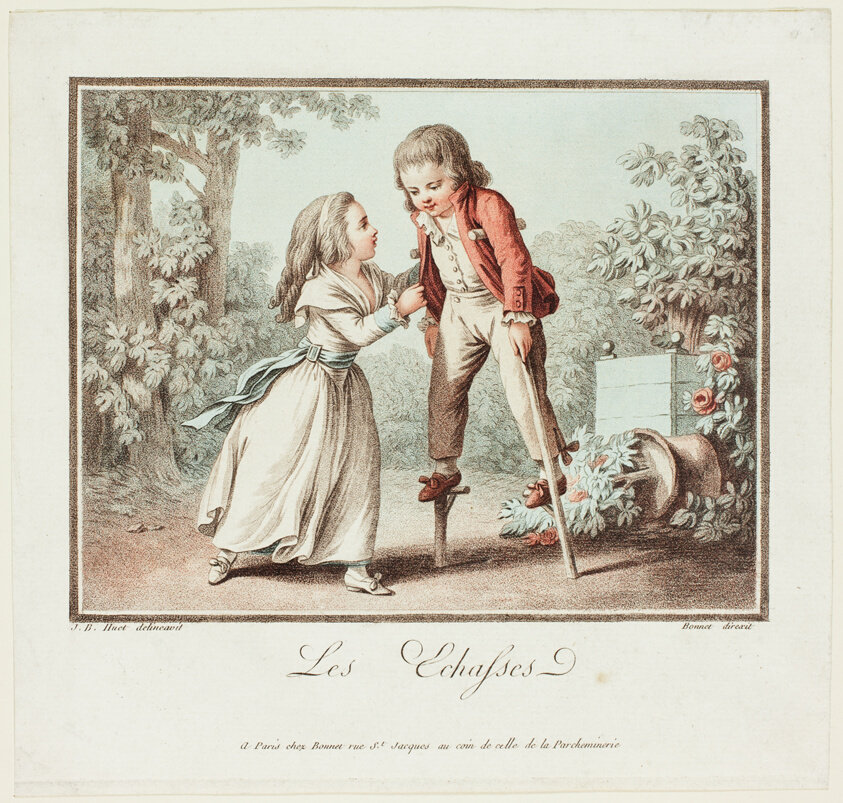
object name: Print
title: The Stilts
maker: Louis-Marin Bonnet (French, 1736-1793); after Jean Baptiste Huet (French, 1745-1811)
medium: Aquatint on paper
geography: France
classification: aquatint; print; prints and drawing